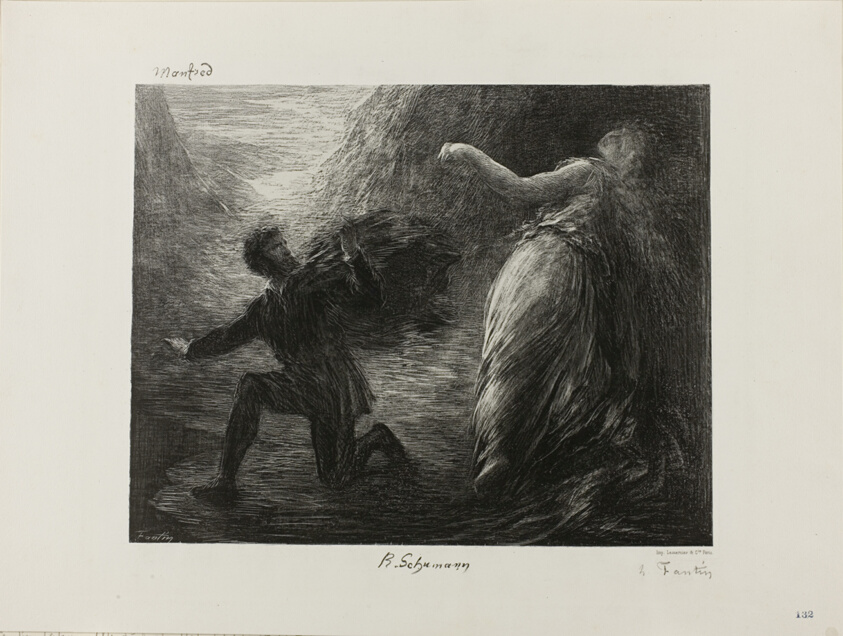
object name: Print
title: Manfred and Astarte, from Robert Schumann's Overture to "Manfred (1848-49)"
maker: Henri Fantin-Latour (French, 1836-1904)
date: 1879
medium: Lithograph in black on off-white China paper laid down on white wove paper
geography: France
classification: lithograph; print; prints and drawing